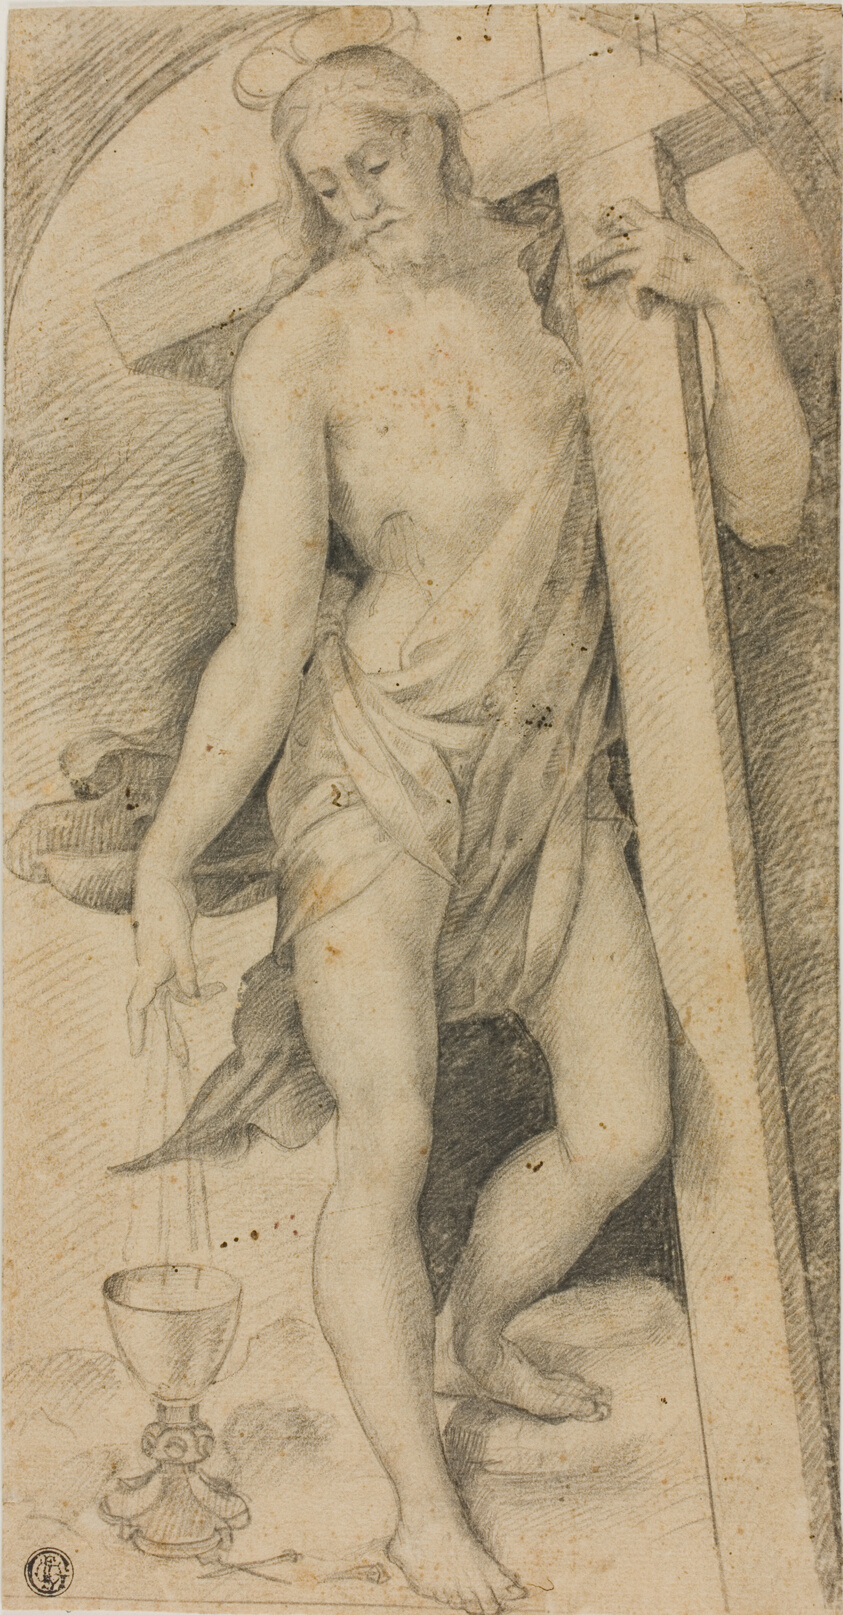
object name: Drawing and Watercolor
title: Christ with the Cross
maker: Circle of Rosso Fiorentino; Italian, 1494-1540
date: c. 1530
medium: Black chalk, on cream laid paper, laid down on tan laid paper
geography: Italy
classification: chalk; drawings (visual works); prints and drawing